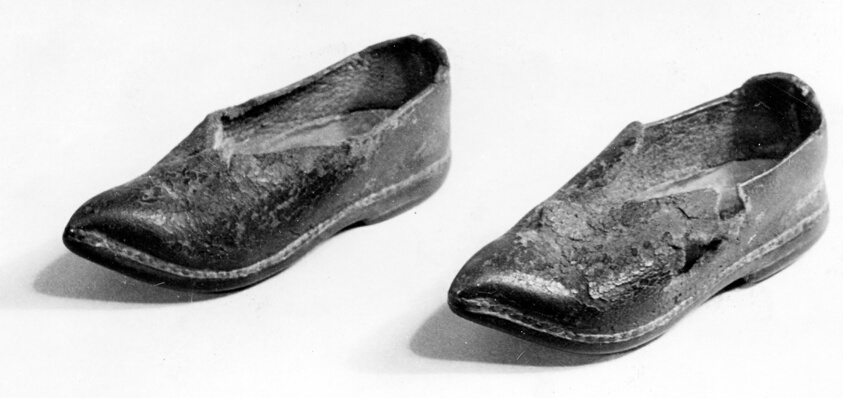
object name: Textile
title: Pair of Childs Shoes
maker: United States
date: 1701/25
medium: Leather; pointed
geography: United States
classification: textile; shoes - misc; costume accessory - shoe; costume; dress (garment); clothing